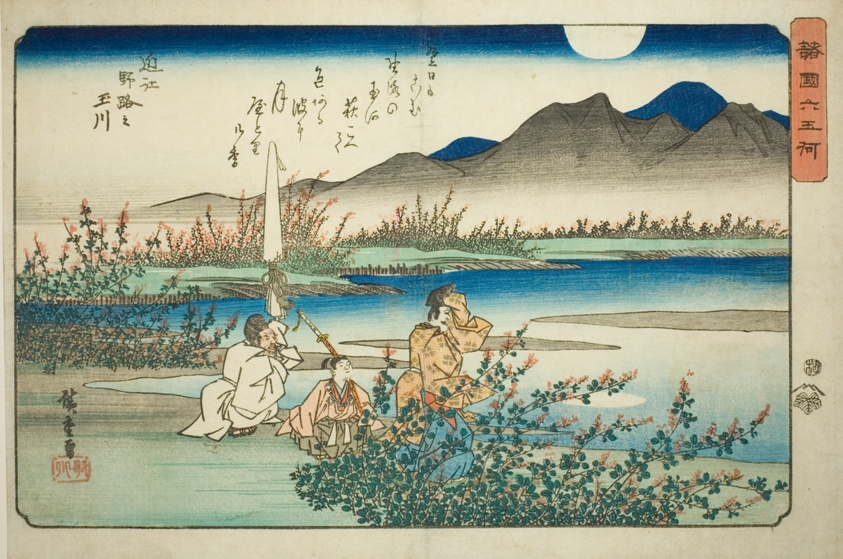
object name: Print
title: The Noji Jewel River in Omi Province (Omi Noji no Tamagawa), from the series "Six Jewel Rivers in Various Provinces (Shokoku Mu Tamagawa)"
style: Japanese (culture or style)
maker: Utagawa Hiroshige 歌川 広重; Japanese, 1797-1858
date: c. 1835/37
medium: Color woodblock print; oban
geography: Japan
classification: woodblock print; print; asian art